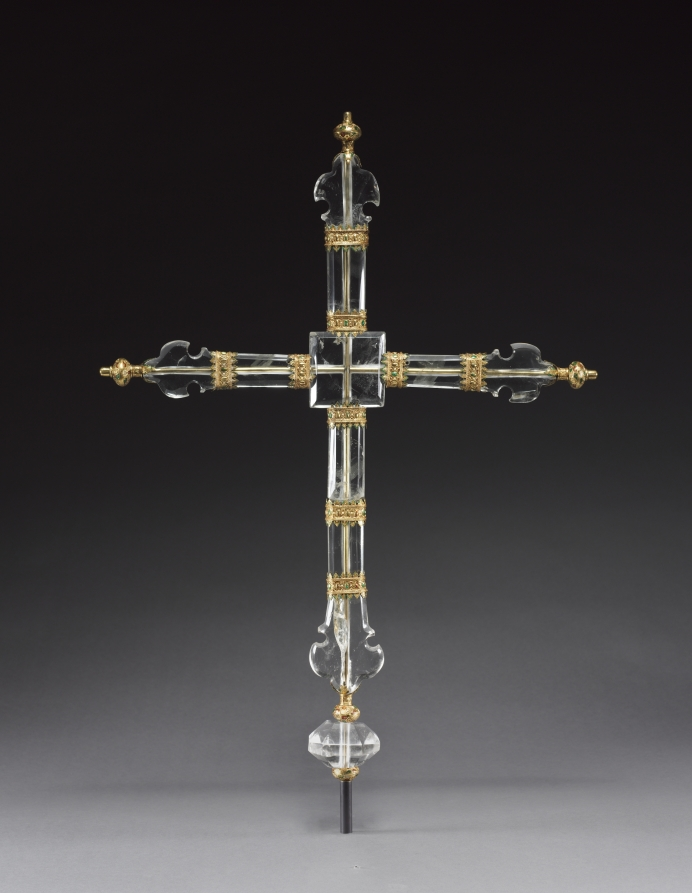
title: Cross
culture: Italy, Venice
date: c. 1280–1300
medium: rock crystal, painted gold mounts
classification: Stone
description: This cross consists of rock crystal pieces drilled through their centers and fastened together with a golden rod. Where they join, the pieces of crystal are bound with decorative bands of painted gold. Venice was one of the most important centers of rock crystal cutting at the end of the 1200s. The cross was undoubtedly intended for prominent display on an altar and may have also been used in liturgical processions. The cross was at one time in the Royal Treasury of Saxony and purportedly first belonged to Rudolph I of Habsburg (reigned 1273–91).